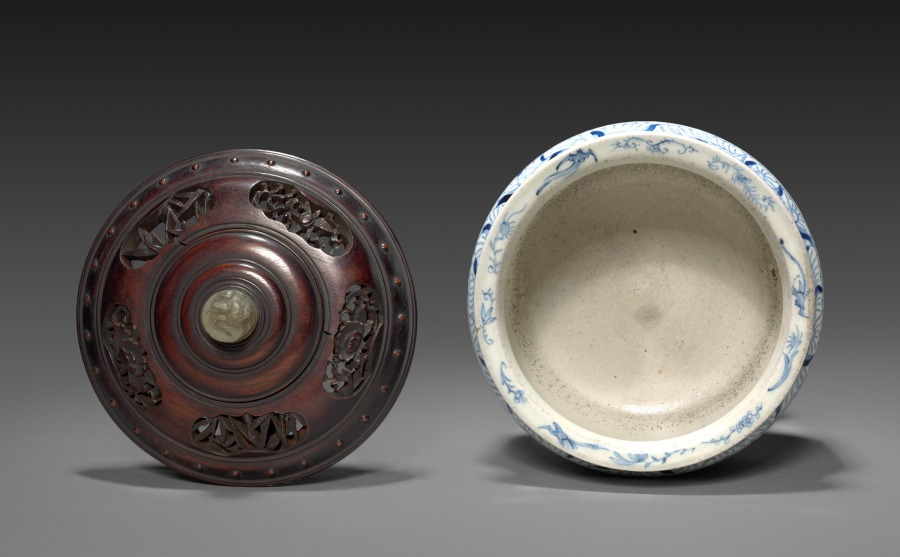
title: Jar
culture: Japan, Edo period (1615–1868)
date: early to mid-1800s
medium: porcelain with underglaze blue; teak and carved stone (lid)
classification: Ceramic